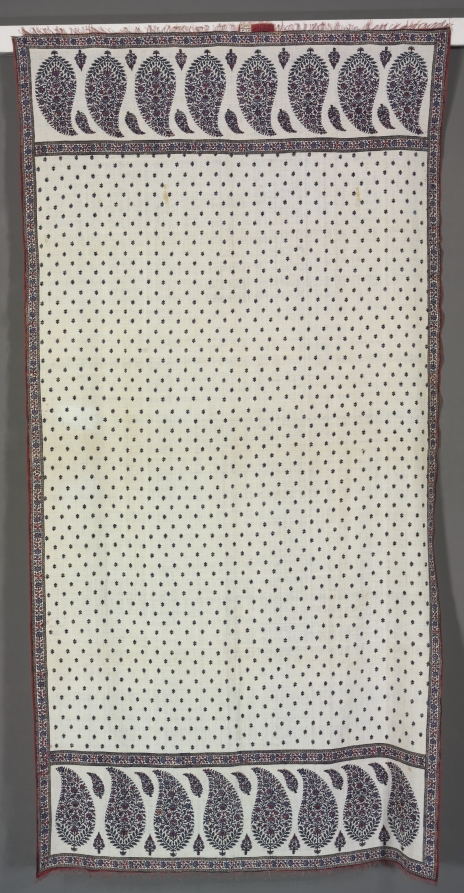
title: Towel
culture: India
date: 1900s(?)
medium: cotton: plain weave, printed on both sides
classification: Textile